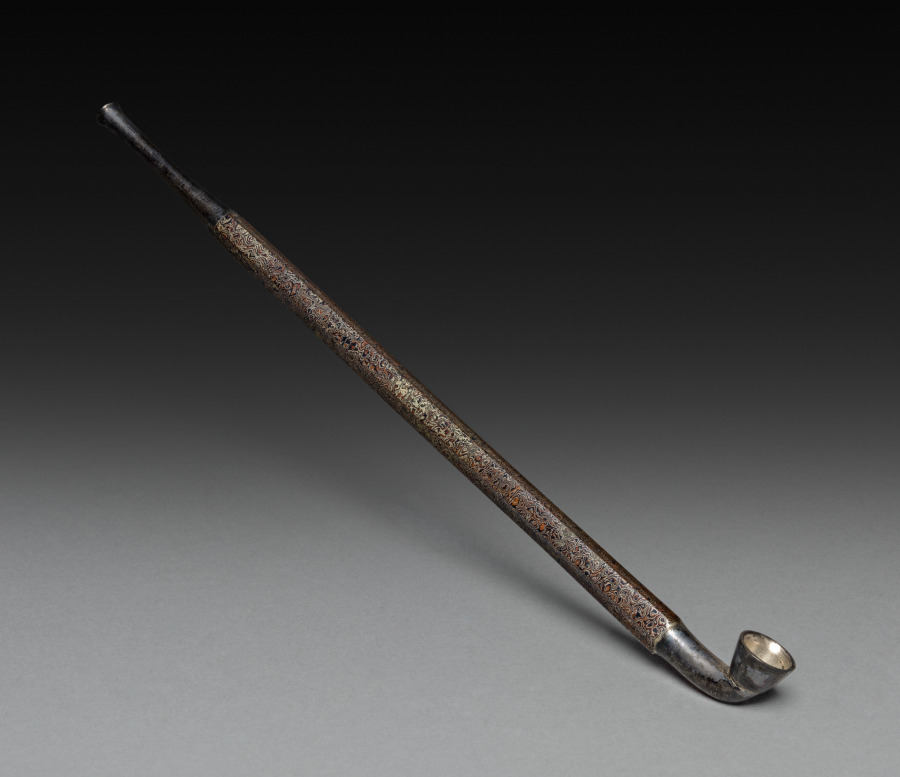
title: Tobacco Pipe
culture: Japan, Edo period (1615–1868)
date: 1700s–mid-1800s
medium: silver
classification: Miscellaneous